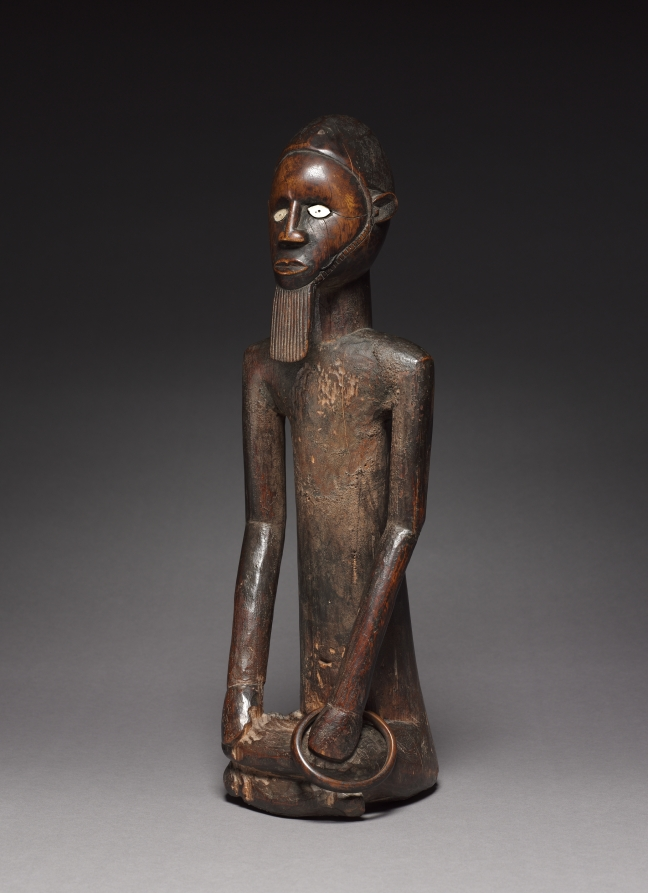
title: Male Figure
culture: Africa, Central Africa, Republic of the Congo, Beembe-style maker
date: late 1800s-early 1900s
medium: Wood, ceramic or Formica, copper alloy, and iron alloy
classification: Sculpture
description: This sculpture played a role in ancestral worship among the Beembe people. Ancestors are held in high regard among the Beembe, and this figure is thought to represent an idealized form of a deceased individual within the ethnic group. The object is one of only two seated male Beembe figures of this size in Western institutions.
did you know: This figure is considered “monumental” as most other types of Beembe figures measure about 15 centimeters tall.